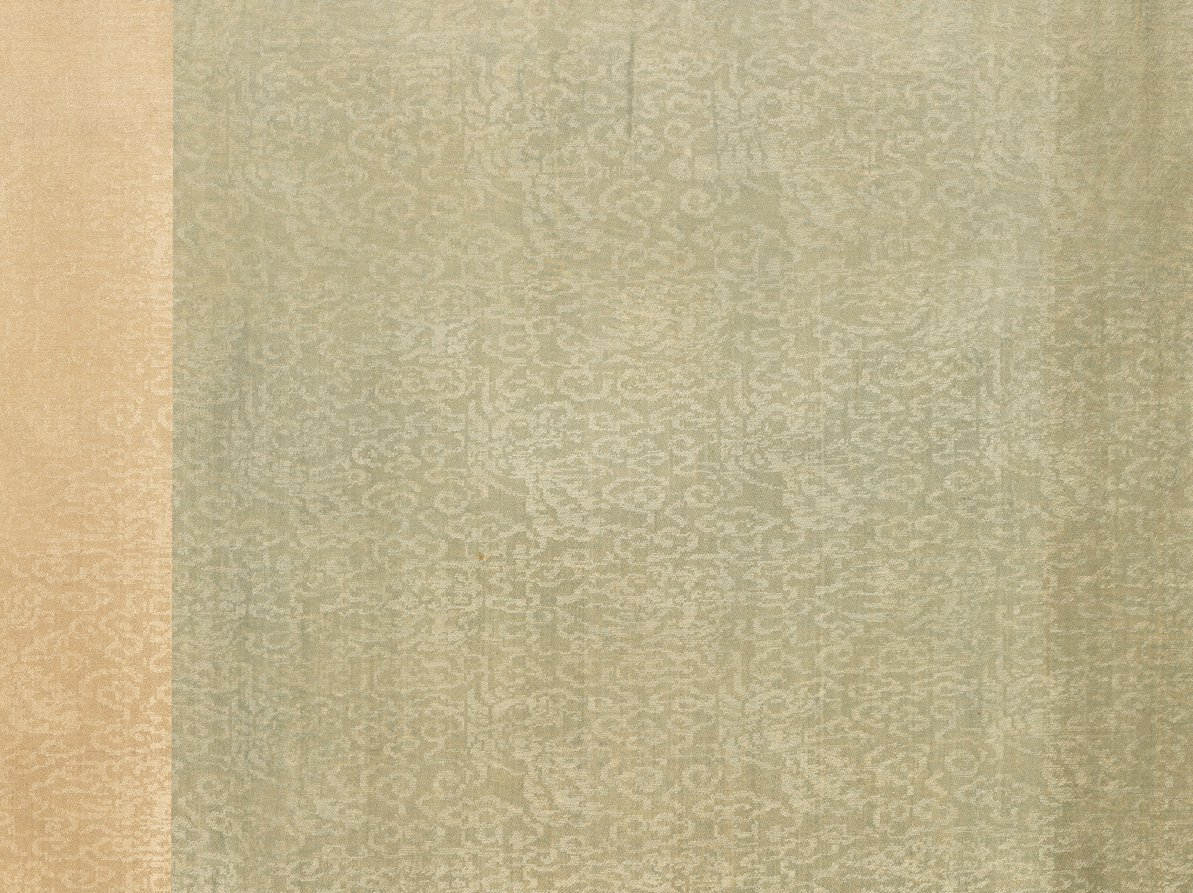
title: Sericulture (The Process of Making Silk)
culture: China, Southern Song dynasty (1127-1279)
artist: attributed to Liang Kai (Chinese, mid-1100s–early 1200s)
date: early 1200s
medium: Handscroll; ink and color on silk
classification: Painting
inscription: 3 colophons and 7 seals of Ch'eng Ch'i (20th c.).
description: By the Southern Song period, the economic center of the silk industry had shifted to the lower Yangzi delta, while the north continued to be troubled by wars. Divided into three sections, the handscroll illustrates 14 steps in the process of making silk, from the raising of silkworms to the weaving of silk cloth. The scroll’s scenes follow the illustrations of Lou Shou’s (1090–1162) Pictures of Tilling and Weaving (gengzhi tu), the first recorded painting of this genre, which was conceived in Hangzhou around 1145. However, in the Cleveland painting the artist groups several scenes of sericulture together under the roof of an open structure.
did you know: The painting is attributed to Liang Kai, a court artist active from about 1201 to 1204 at the Imperial Painting Academy in the city of Hangzhou, a major silk weaving center from that time to the present day.